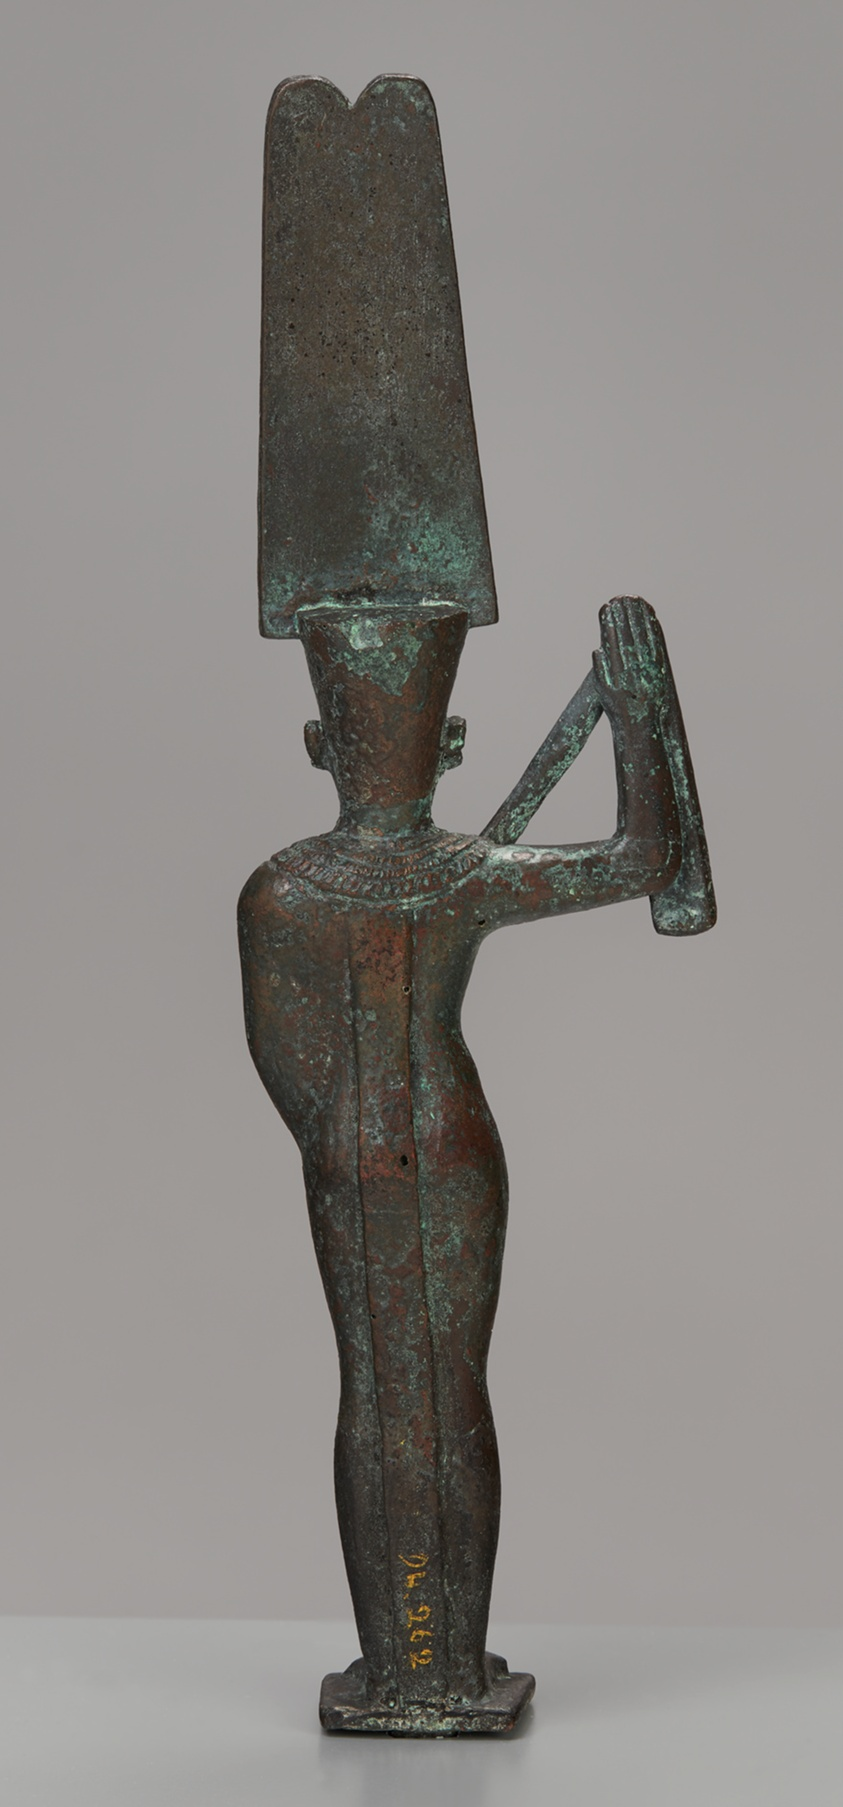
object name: Sculpture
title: Statuette of the God Min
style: late period (egyptian), egyptian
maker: Egyptian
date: Late Period, Dynasties 26–31 (664–332 BCE)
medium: Copper alloy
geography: Egypt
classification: statuette; bronze; metal; sculpture; ancient art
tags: gods (deities)